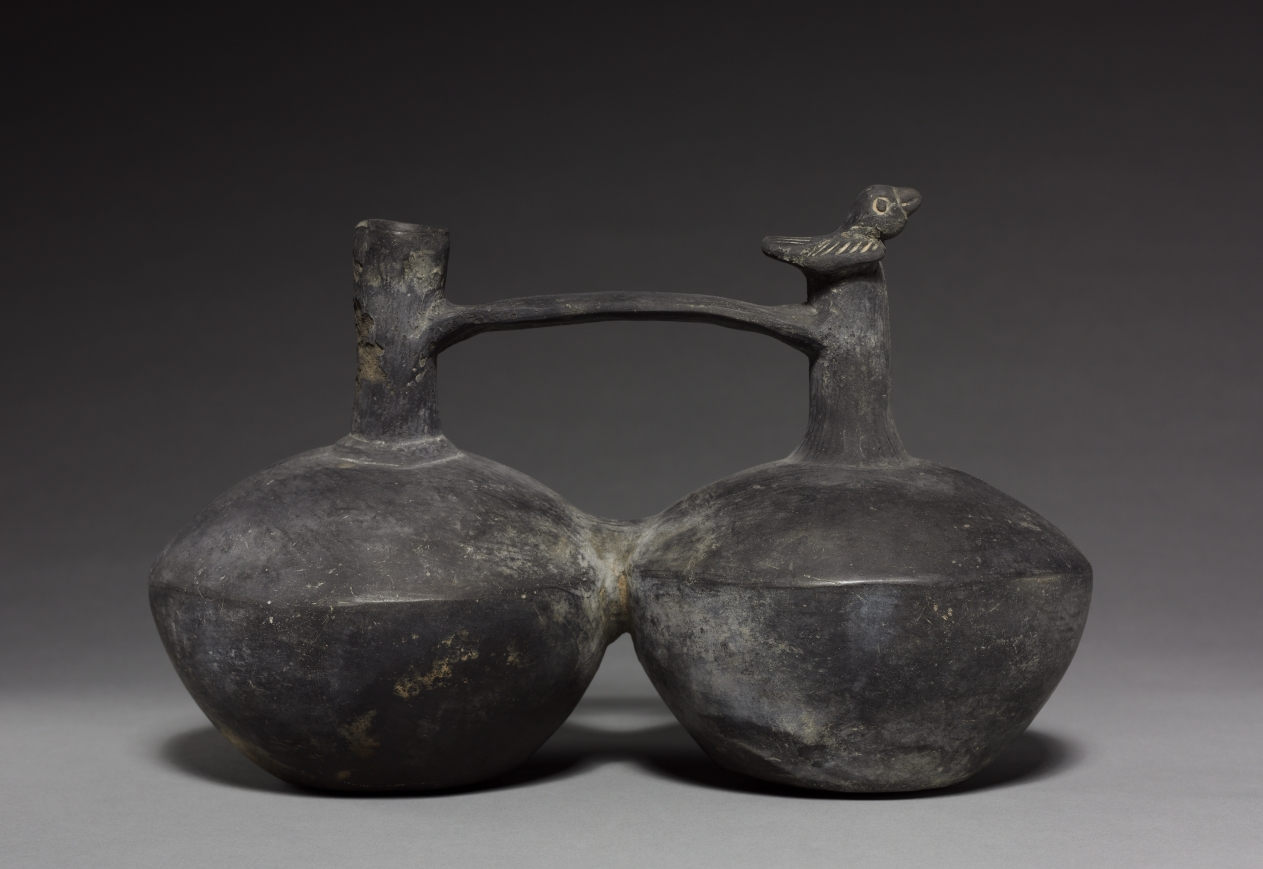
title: Bottle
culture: Peru, Chimú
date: 1300–1400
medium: pottery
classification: Ceramic